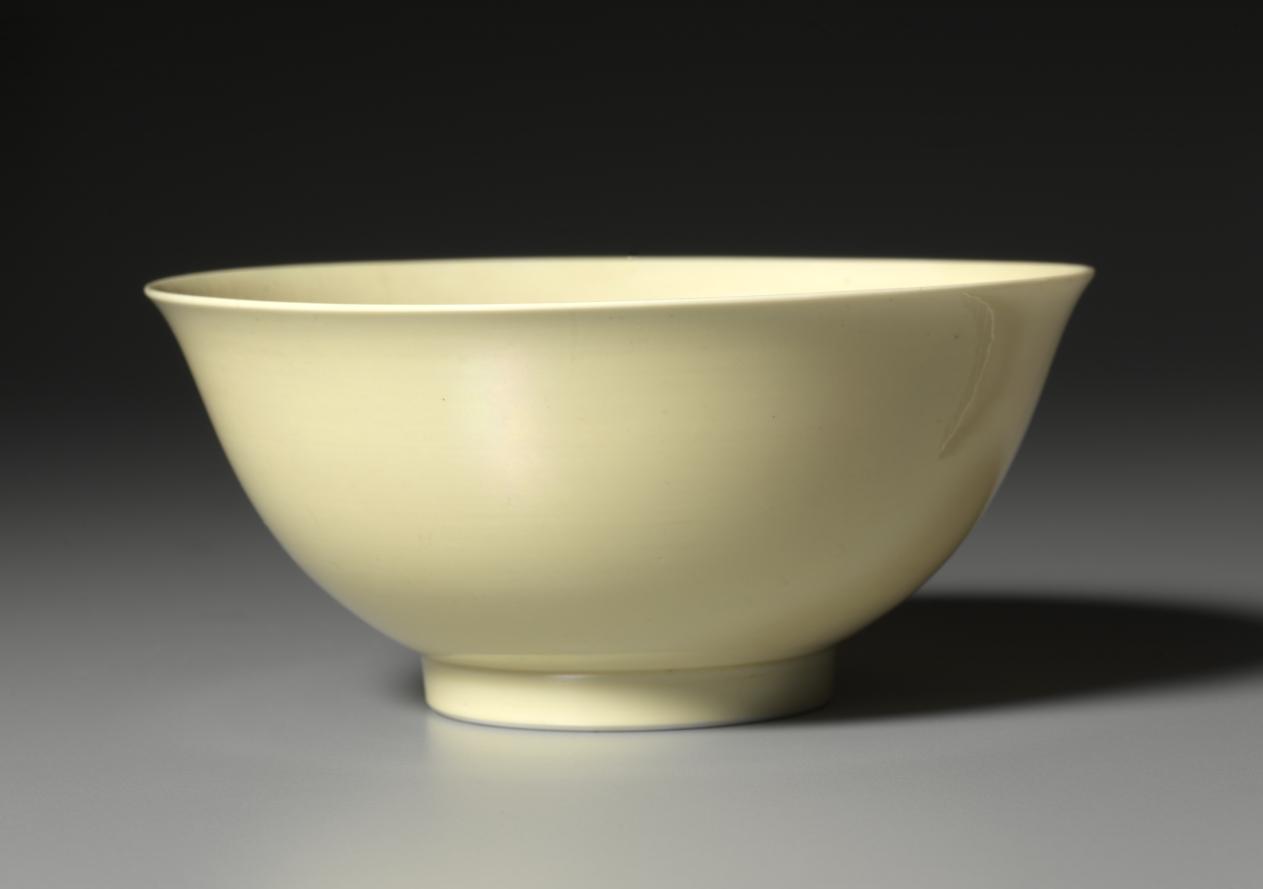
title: Bowl with Yellow Glaze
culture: China, Qing dynasty (1644-1911), Yongzheng mark and reign (1723-35)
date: 1723–35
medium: glazed porcelain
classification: Ceramic